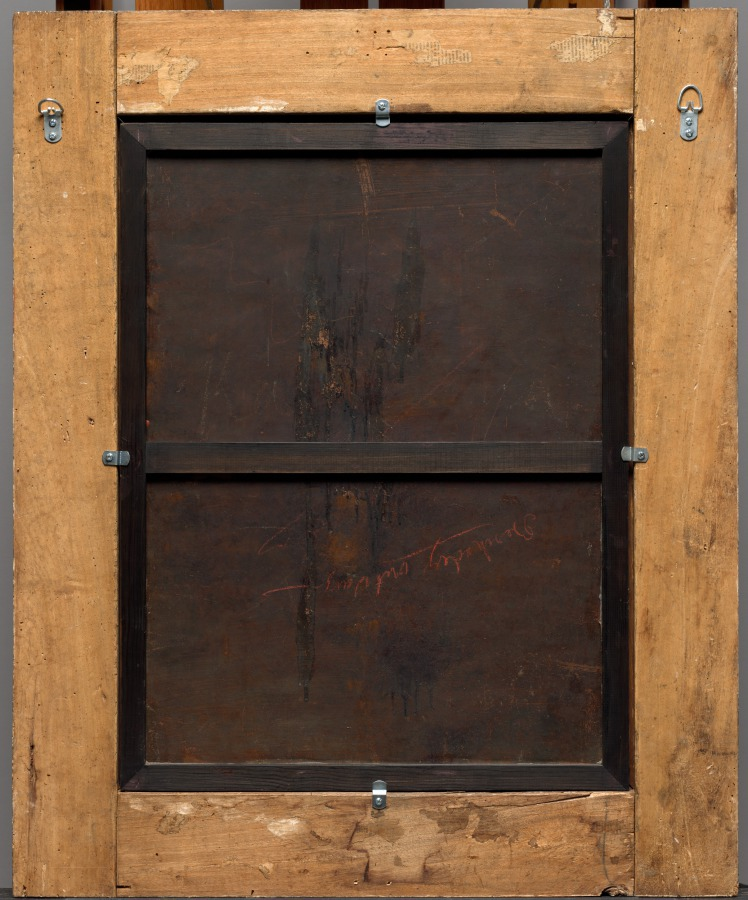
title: The Resurrection of Christ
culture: Germany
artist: Johann König (German, 1586–1642)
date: 1622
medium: oil on copper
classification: Painting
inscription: Signed and dated lower left: Johan. : König / 1622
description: According to Christian belief, three days after his death by crucifixion, Christ rose from the dead and ascended into heaven. König’s interpretation of this traditional theme employs vivid colors and explosive poses to express the drama of the event. Meticulous brushwork delineates exquisite details, and draws attention to the luminous landscape and the three holy women hastening towards Christ’s vacant tomb.